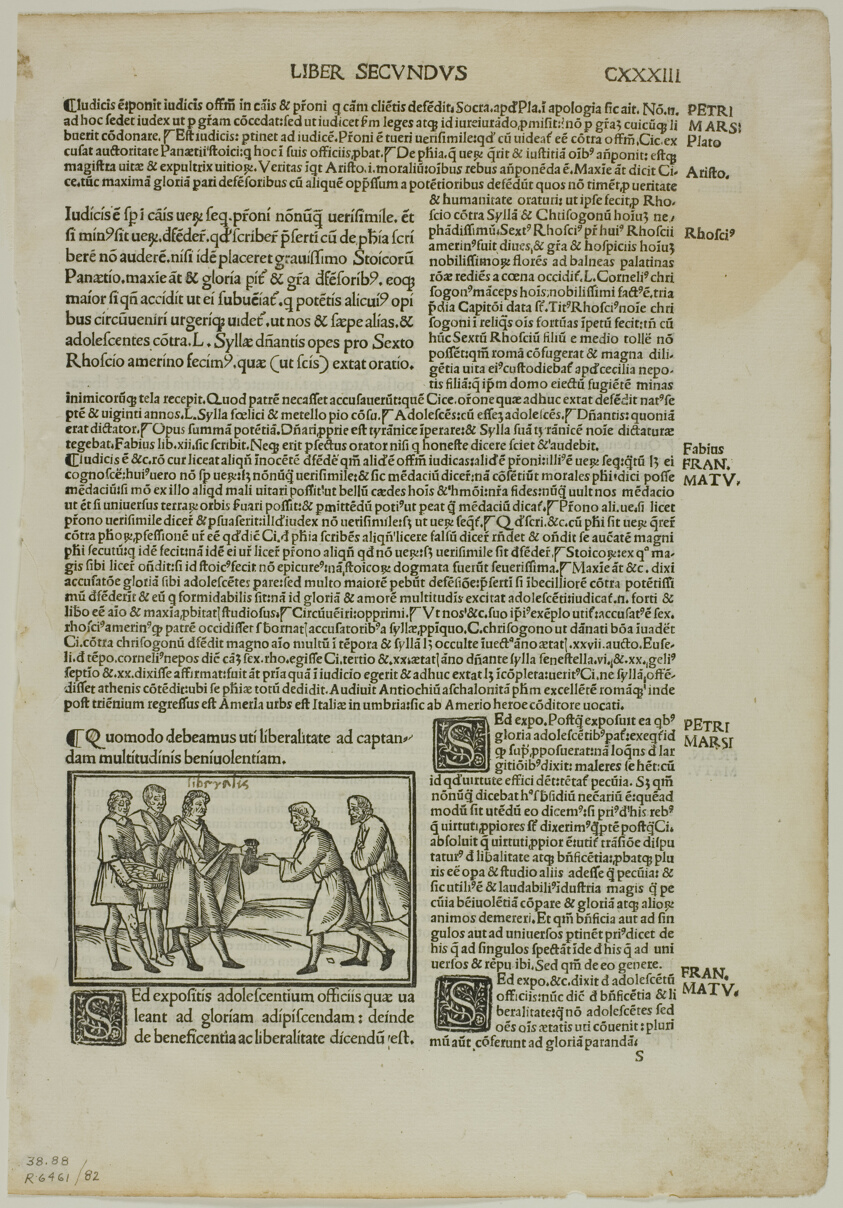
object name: Print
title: Quomodo debeamus uti liberalitate ad captandam multitudinis beniuolentiam (How We Must Use Liberality to Capture the Favor of the Multitude) from De Officiis by Cicero, plate 82 from Woodcuts from Books of the XVI Century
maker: Unknown Artist (Italian, 16th century); assembled by Max Geisberg (Swiss, 1875-1943)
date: 1506, assembled into portfolio 1937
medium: Woodcut on paper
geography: Italy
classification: woodcut; print; prints and drawing